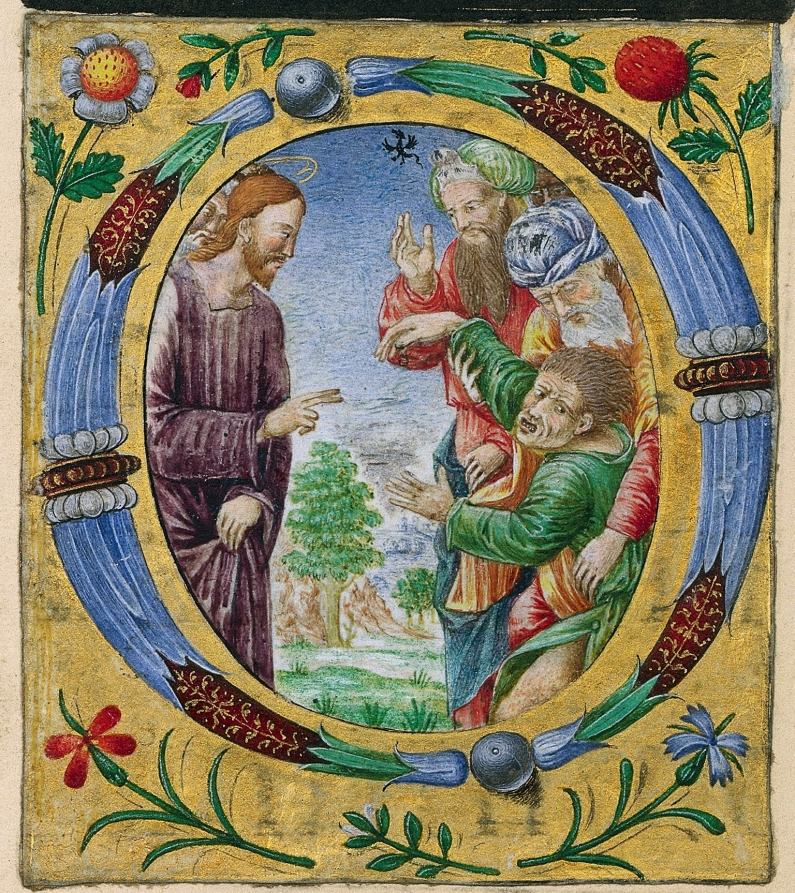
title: Cutting from a Missal: Initial O with Christ Performing an Exorcism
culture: Italy, Rome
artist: Matteo da Milano (Italian)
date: c. 1520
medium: ink, tempera, and liquid gold on vellum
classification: Manuscript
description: This initial is probably the O beginning the Introit for the Third Sunday in Lent, Occuli mei semper ad Dominum (My eyes are ever towards the Lord). The Gospel reading from that Sunday tells the story of Christ casting out a demon. The artist's style is easily recognized in the facial features, and in the borders, in which he typically mixed still-life motifs, scattered small red and blue flowers, strawberries, and simulated pearls and jewels. Matteo's life dates are not known. His career probably began in Milan in the 1490s, but his name occurs in the accounts of the d'Este family at Ferrara from 1502 to 1512. The climax of Matteo's career was his activity in Rome, where he was apparently responsible for a number of luxury illuminated liturgical manuscripts. In 1520 he illuminated a missal for Cardinal Giulio de' Medici, the future Pope Clement VII (1523–34). The initial shown here comes from another missal that he must have illuminated around the same time. This missal was most probably in the Sistine Chapel sacristy when it was sacked by Napoleon's troops in 1798.